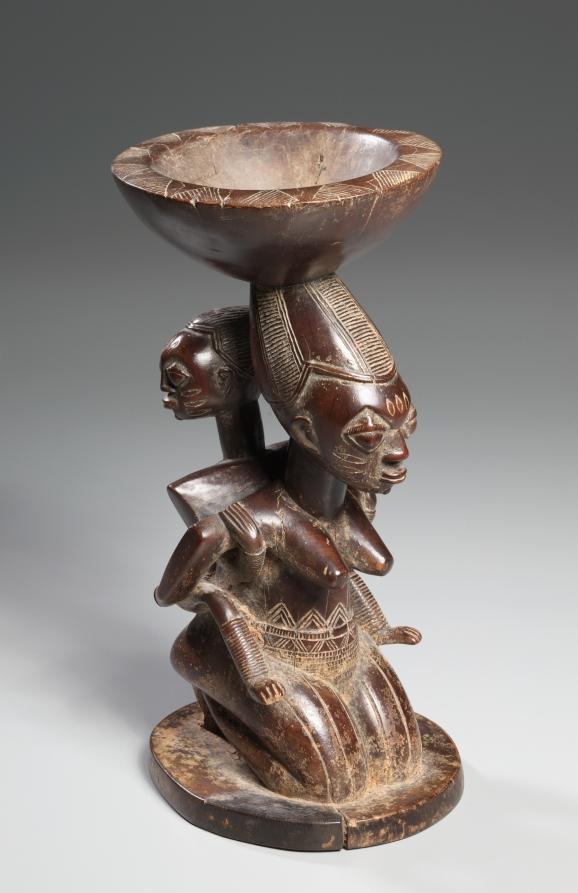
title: Ifá divination vessel (àgéré Ifá)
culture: Africa, West Africa, Nigeria, possibly Èkìtì State, Yorùbá-style carver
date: mid- late 1800s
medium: Wood and colorant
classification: Sculpture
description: The mother figure of this vessel from the Southern Ekiti region represents a devotee who kneels before the gods. The vessel once held the 16 sacred palm nuts essential to divination rituals. The object was used by a priest as a medium through which to communicate with the god of fate, Orunmila, in order to gain insight into an individual’s destiny or to understand the cause of misfortune.